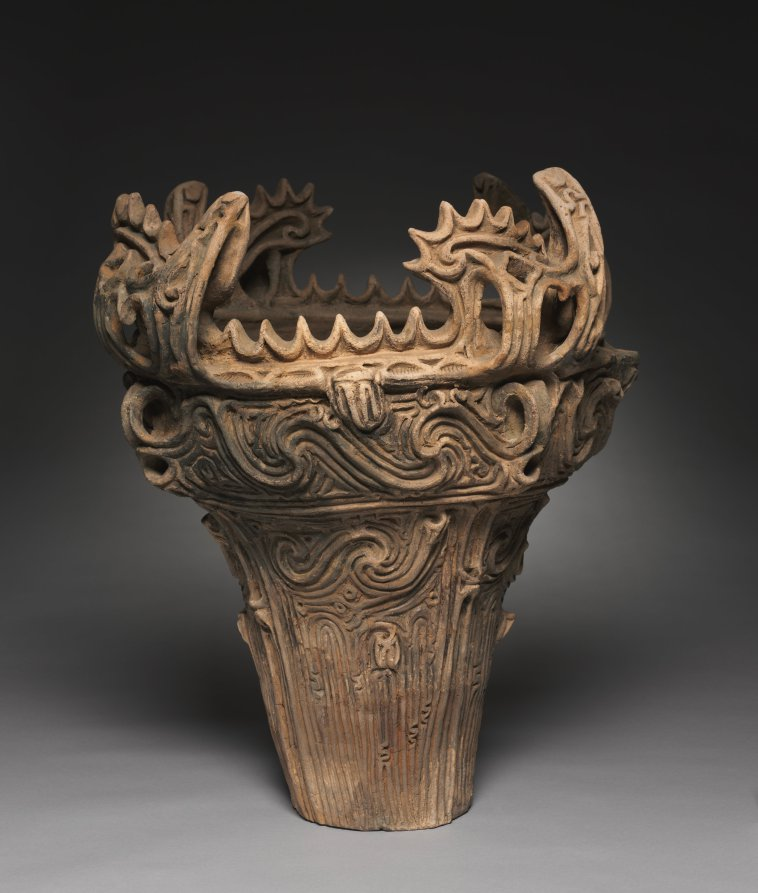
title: Fire-flame Cooking Vessel (Ka'en Doki)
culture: Japan, Jōmon period (c. 10,500–300 BCE)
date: c. 2500 BCE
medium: Earthenware with carved and applied decoration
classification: Ceramic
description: Archaeologists call this kind of vessel “fire flame,” ka’en in Japanese, because its top resembles flames. No one knows why the design was made or what it actually represents. This example is remarkable for the amount that is original. It was recently determined that a bottom from a different vessel was used during its reconstruction in the 1900s, creating a false impression of its intended scale; it would have initially been about four inches shorter. Since their lower portions were set into holes in the ground during use, bases of pots like this one often deteriorate and may be missing when they are excavated.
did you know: Scientifically tested residues from Jōmon vessels reveal that their makers consumed detoxified acorns.